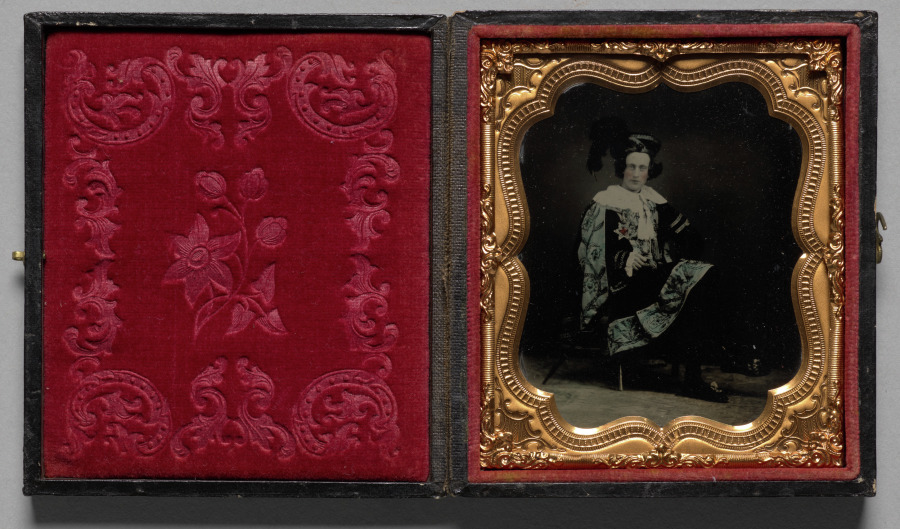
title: Shakespearean Actor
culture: America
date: c. 1858–1862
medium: ambrotype, tinted, sixth plate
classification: Photograph